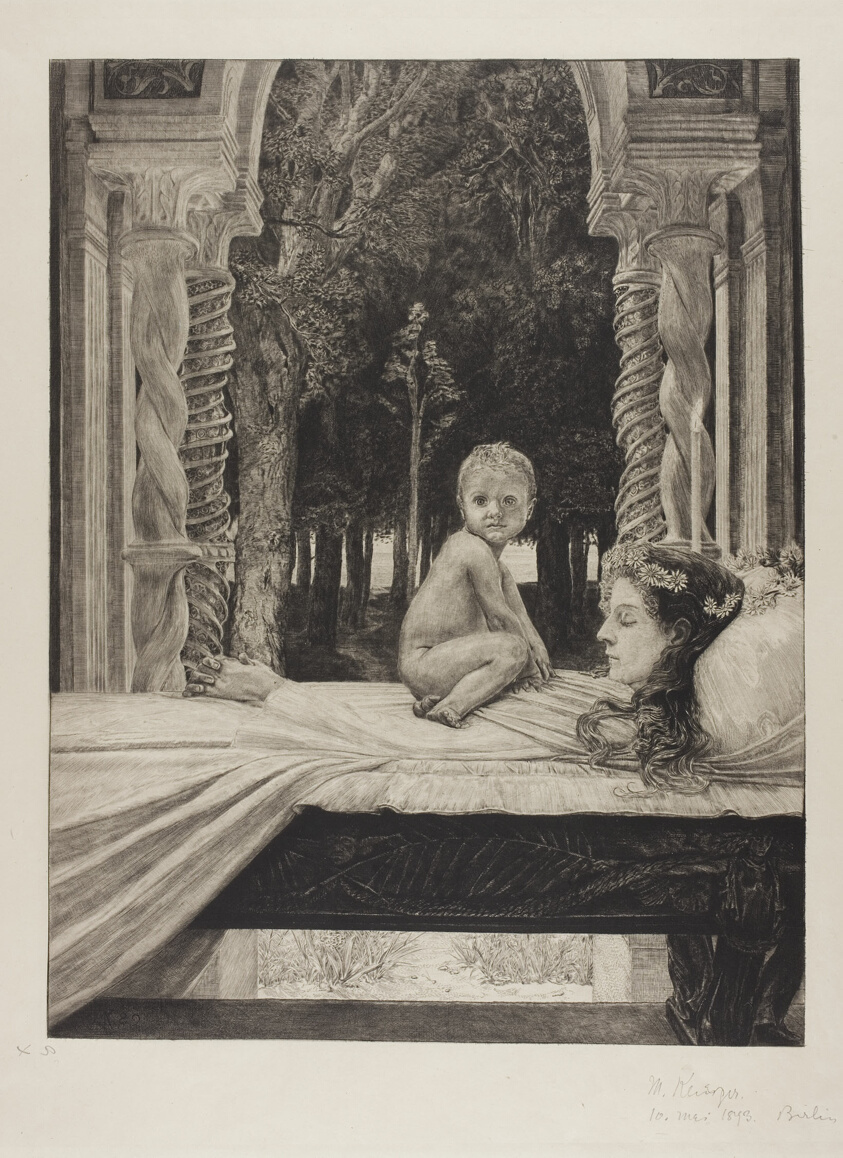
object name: Print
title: Dead Mother, plate ten from On Death, Part II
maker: Max Klinger (German, 1857-1920)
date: 1889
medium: Etching in black ink on lightweight cream wove paper, laid down on cream wove paper (chine collé)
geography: Germany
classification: etching; print; prints and drawing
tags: mothers, children, babies, death